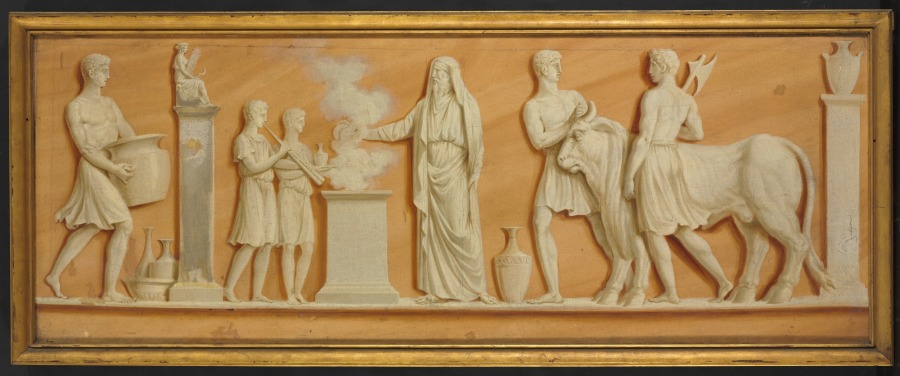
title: Overdoor Painting and Double-Leaf Doors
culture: France, 18th century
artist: Pierre Rousseau (French, 1751–1829)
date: 1790s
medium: oil on canvas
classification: Painting